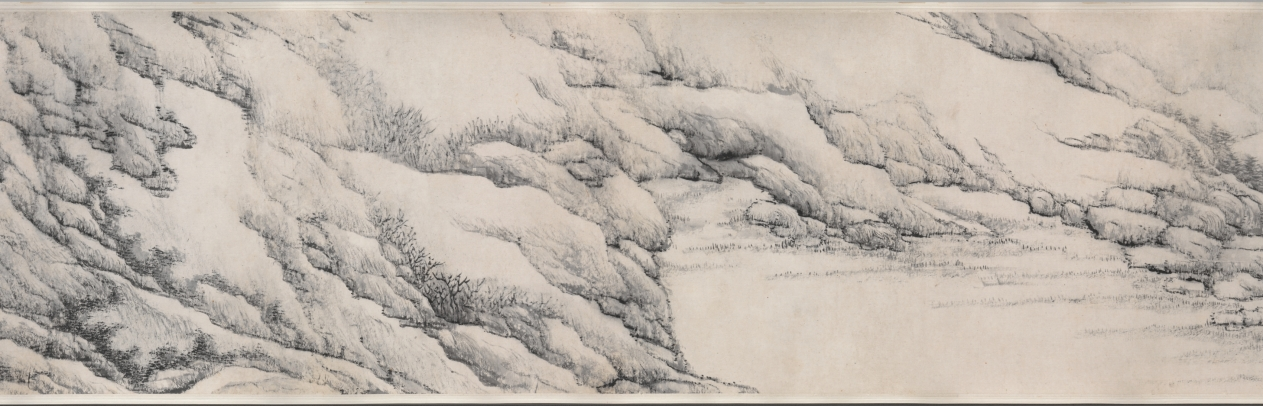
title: Snow Coloring the World White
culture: China, Qing dynasty (1644-1911)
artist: Fa Ruozhen (Chinese, 1613–1696)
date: 1690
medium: handscroll, ink on paper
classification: Painting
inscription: Artist's title on frontispiece, colophon with 6 poems, and 7 seals: [seal] Ch'ien-k'un i ts'ao t'ing. Snow Coloring the World White. Huang-shan lao-jen, Jo-chen, at the age of seventy eight. [2 seals] Fa yin Jo-chen; Huang-shih shih. (Artist's poems are not translated.) In the first month of the keng-wu year [1690], 1 was seventy-eight years old. On a snowy day I was pleased to have my good son-in-law Ch'eng-ssu and other gentlemen visiting me at my Tz'u-ching Hall at Yellow Hill. I did this snowscape to record the event. [2 seals] Fa Jo-chen; Tun Chai. [2 seals at end of painting] Fa yin Jo-chen; Huang-shih shih. trans. LYSL/WKH 12 additional seals: 8 of Ho Kuan-wu (20th c.); 1 of Wang Nan-p'ing (20th c.); 3 unidentified.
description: Fa Ruozhen was a scholar-official and prolific poet who focused on painting as his government career declined. The inscription records that he was 78 years old when he painted this handscroll to welcome visitors on a snowy day. At this point in his artistic development, Fa created expressive landscapes and experimented with unconventional brushwork. This handscroll begins at the right with gentle hills dotted with evergreens and bare deciduous trees. By the end, the twisting rocky forms dominate. Fa’s official career spanned the fall of the Han Chinese Ming dynasty (1368–1644) and the rise of the Manchurian Qing dynasty (1644–1911). While other scholar-officials who declined to serve the Manchus had their reputations enhanced, critics accused Fa of disloyalty for serving in the new bureaucracy. Fa was deeply sensitive about this criticism. In many of his 4,000 known poems, he responded by emphasizing the Confucian virtue of being a good administrator particularly during an unstable time. Fa’s “disorderly” brushwork and distressed landscapes seem to reflect the political upheaval of his era.